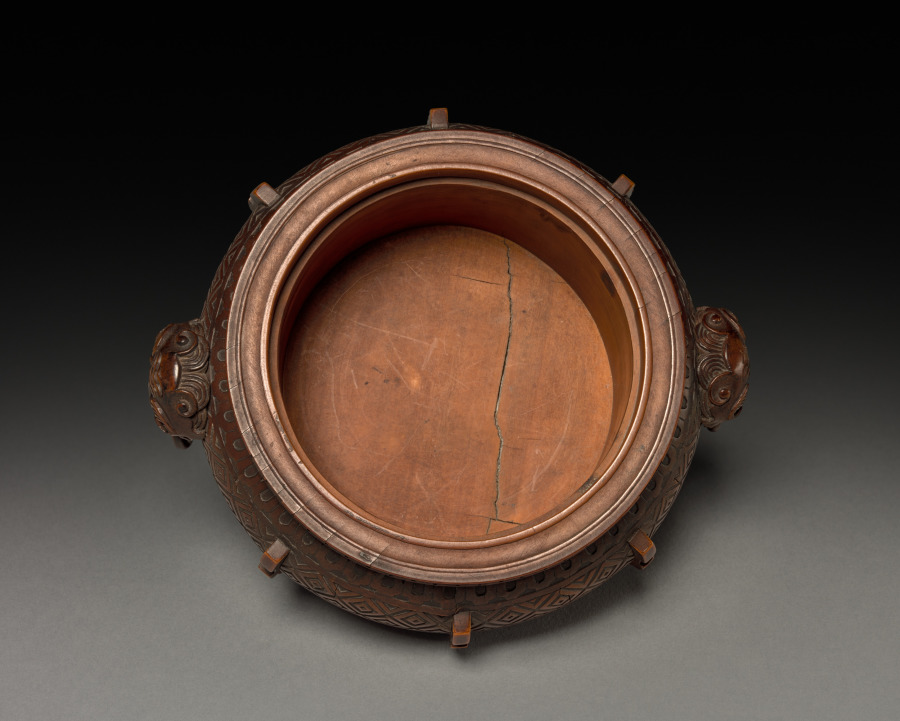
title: Tripod with Cover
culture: China, Qing dynasty (1644-1911)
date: late 1700s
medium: carved wood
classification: Wood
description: In the Qing (1644–1911) dynasty, luxury items became more affordable to larger parts of the society, including women, merchants, and literati in non-official positions. Imperial patronage and a growing urban population encouraged consumption of luxury goods and local craftmanship. This wooden tripod illustrates superb carving skills and the creative mind of the skilled artisan who sought clients on a competitive market.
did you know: Each leg of the tripod is decorated with a lion head.